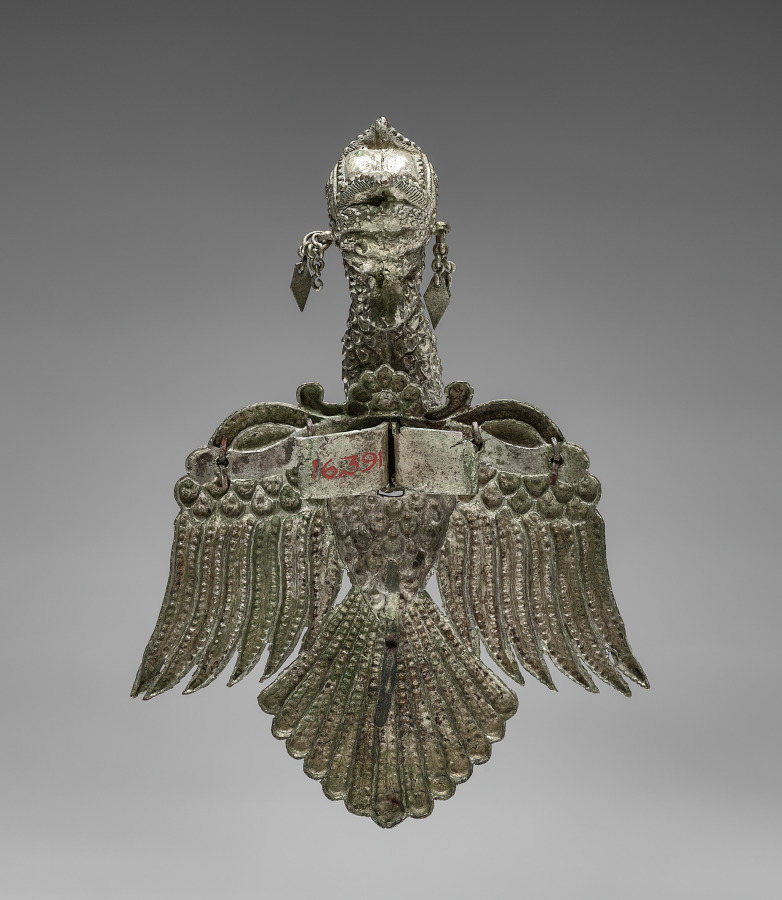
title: Hat Ornament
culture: Burma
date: 1800s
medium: silver and rubies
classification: Jewelry